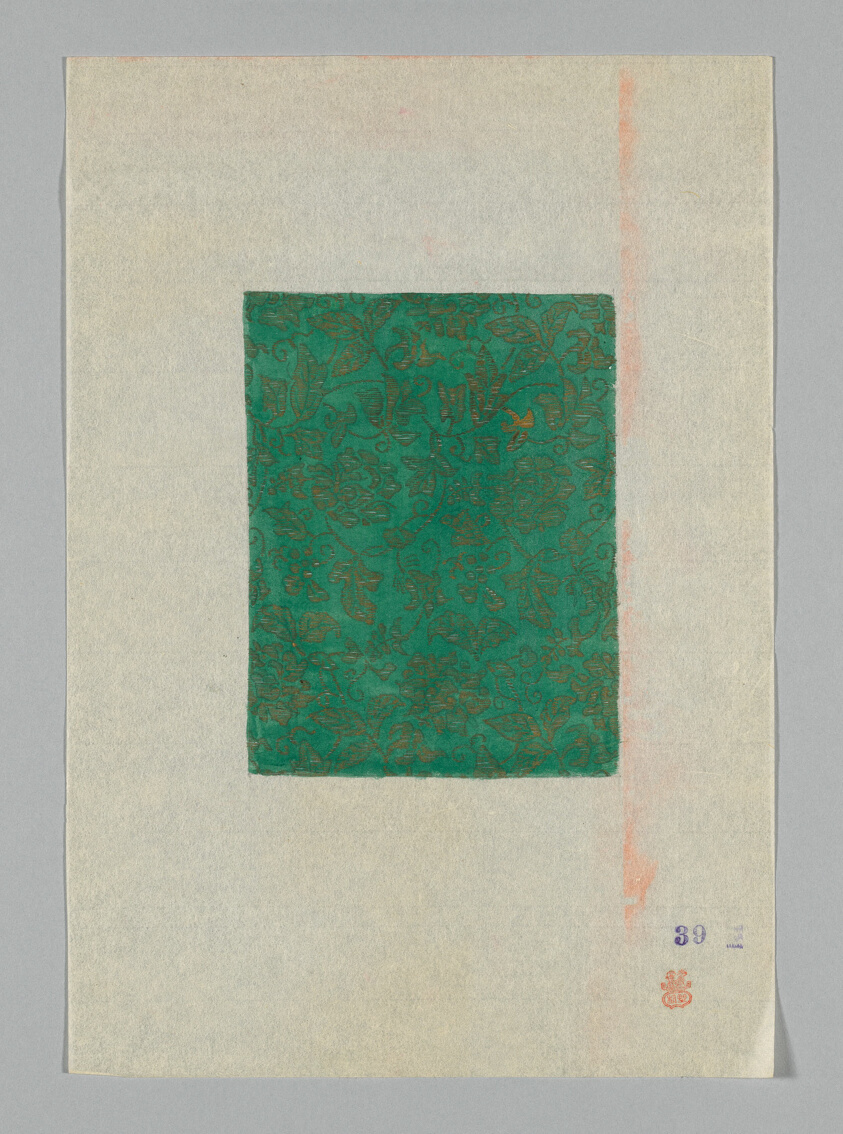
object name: Drawing and Watercolor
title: Design on Paper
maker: Japan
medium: Paper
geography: Japan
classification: textile; accessory - paper design; watercolor; paper